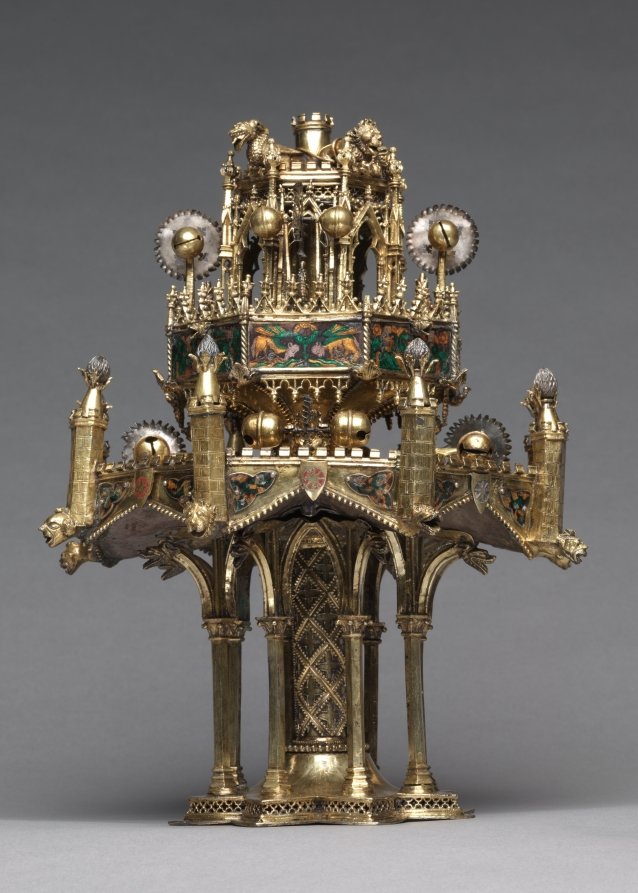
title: Table Fountain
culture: France, Paris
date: c. 1320–40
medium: gilt-silver and translucent enamels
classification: Metalwork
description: Conceptually and stylistically, this object is beyond all else a piece of Gothic architecture in miniature with vaults, pinnacles, columns, and traceried arches. Though the artist who created it is unknown, he was unquestionably inspired by the great Gothic buildings of his time. The table fountain is a three-tiered assembly combining cast elements with bent sheets of gilt-silver. To these have been attached a series of enamel plaques representing grotesque figures, some of which play musical instruments. Water wheels and bells were added to capture motion and sound. The rich detail, precious materials, and involved ornamentation of this deluxe object suggest it would have been expensive to produce and highly treasured by its original owner, someone of high status, and would have been deployed as an object of spectacle. This is the most complete example of its type known to survive from the Middle Ages. Medieval inventories reveal that small fountains like this, often taking various forms, and generally made from precious metals, once existed in large numbers, thus making the Cleveland table fountain an extremely rare object.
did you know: This fountain with its minute architectural details and finely made enamel plaques displayed the wealth and refinement of the owner as it entertained his guests. Imagine hearing the ringing of the tiny bells when this fountain was in use.